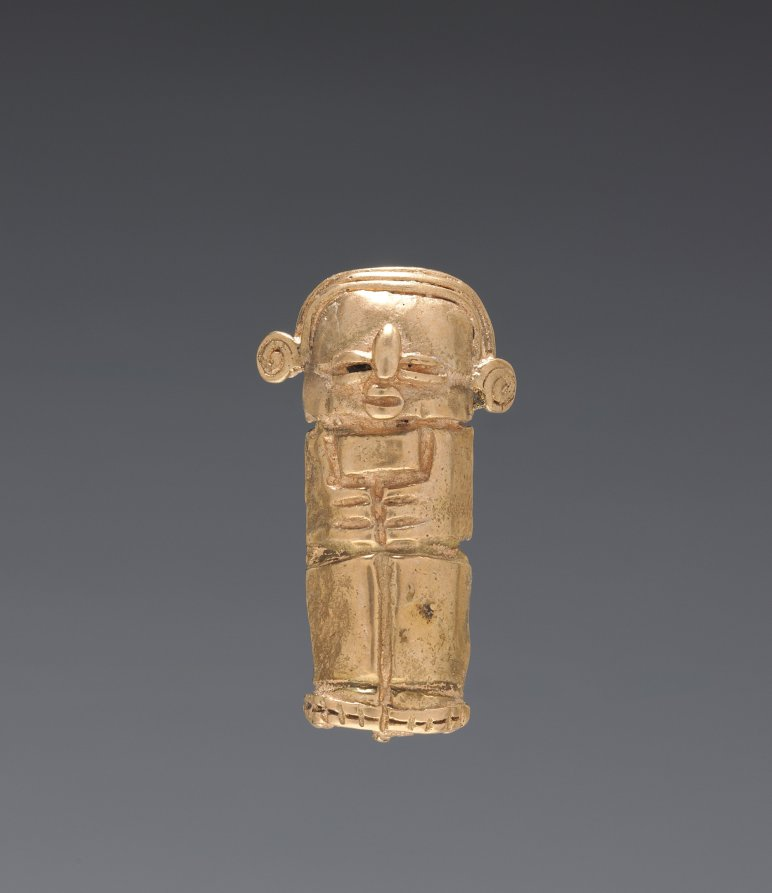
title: Necklace Figurine Bead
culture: Colombia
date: 1–700 CE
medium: cast gold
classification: Jewelry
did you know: Working with gold dates back to at least 500 BC in Ecuador and Colombia.